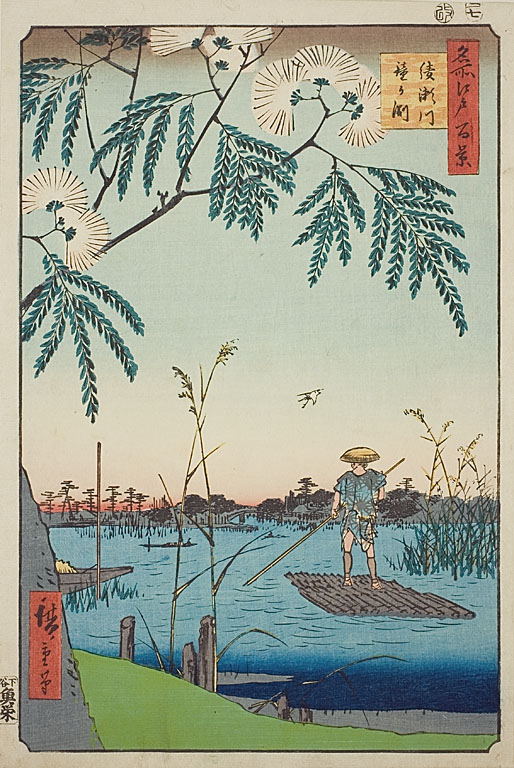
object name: Print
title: Ayase River and Kanegafuchi (Ayasegawa Kanegafuchi), No.63 from the series "One Hundred Famous Views of Edo (Meisho Edo hyakkei)"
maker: Utagawa Hiroshige (Japanese, 1797-1858)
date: 1857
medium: Color woodblock print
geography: Japan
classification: woodblock print; print; asian art